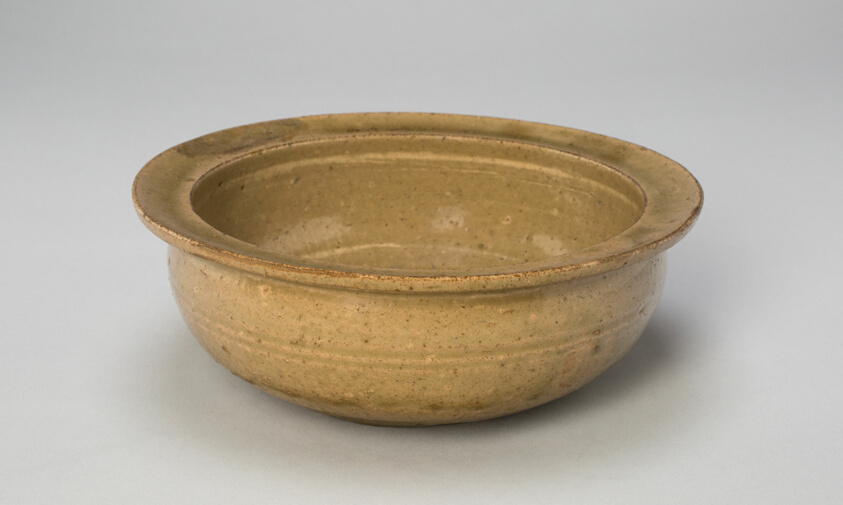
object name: Vessel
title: Bowl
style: Chinese (culture or style)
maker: China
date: Six dynasties (220–589) or Tang dynasty (618–907), c. 6th/7th century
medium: Yue ware; stoneware with celadon glaze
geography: China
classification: bowl; dish (vessel); ceramics; asian art; vessel